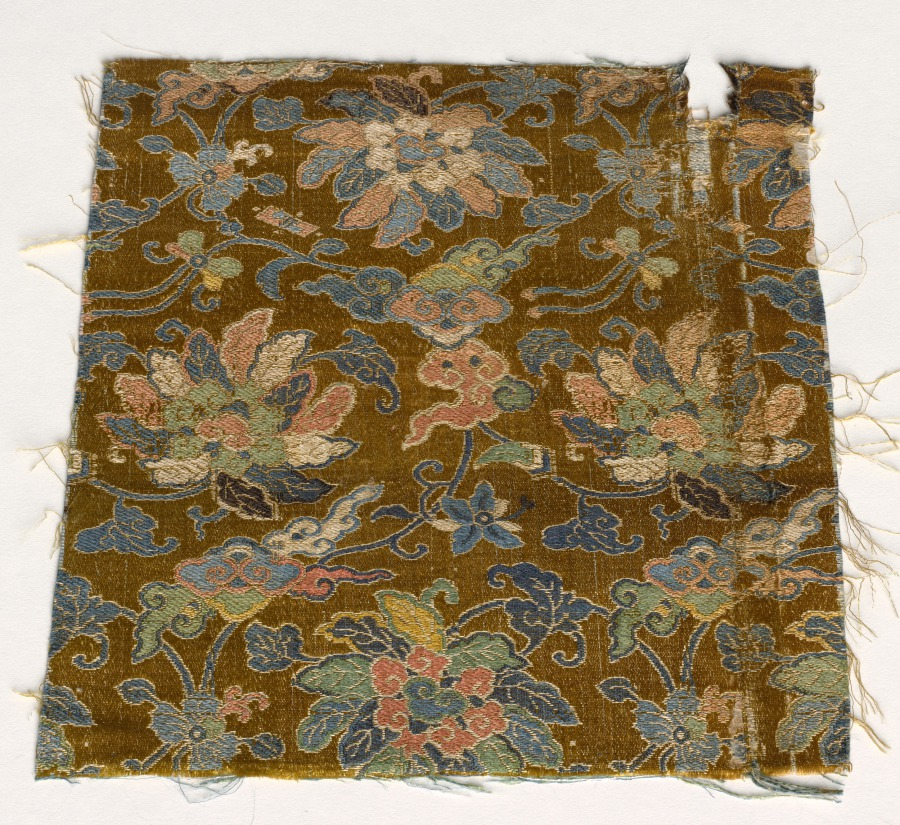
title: Fragment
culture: China, 18th century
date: 1700s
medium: satin ground; silk diasper weave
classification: Textile